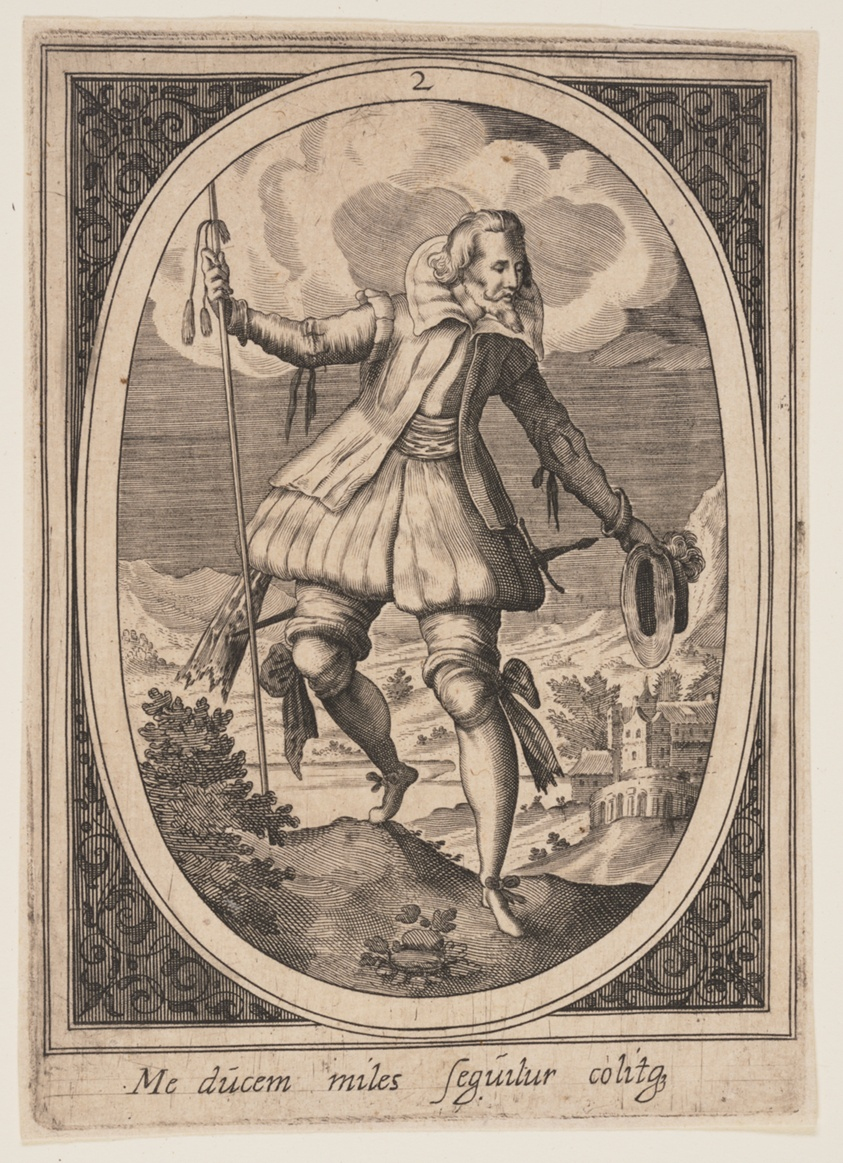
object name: Print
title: Plate 2 from Military Figures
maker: Attriuted to Heinrich Ulrich (German, c. 1572-1621); possibly after Paul Mair (German, active c. 1600)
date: c. 1590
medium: Engraving on ivory laid paper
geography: Germany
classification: engraving; paper; print; prints and drawing